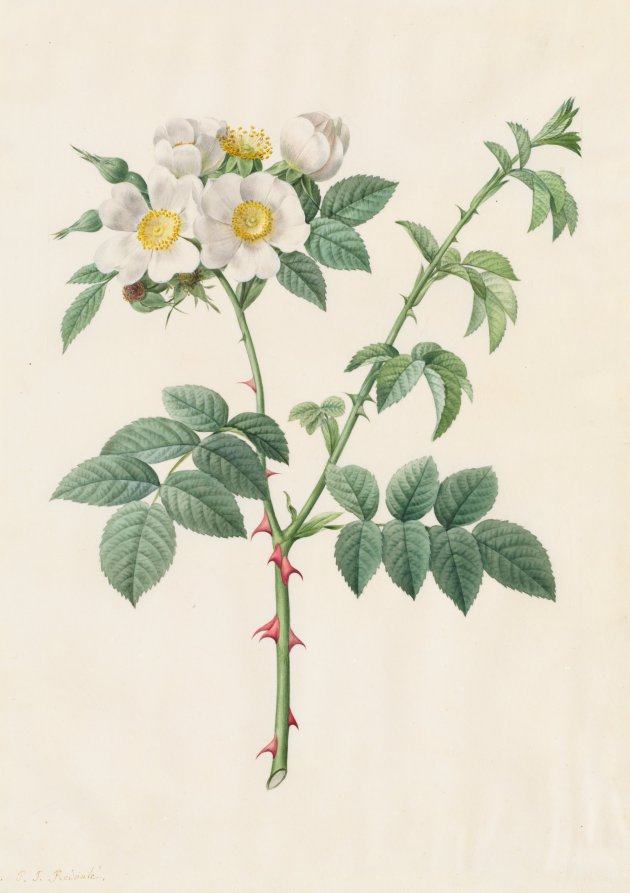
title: Brier Bush Rose or Dog Rose (Rosa Leucantha)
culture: France, 19th century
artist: Henri Joseph Redouté (French, 1766–1853)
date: 1817–1824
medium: watercolor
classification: Drawing